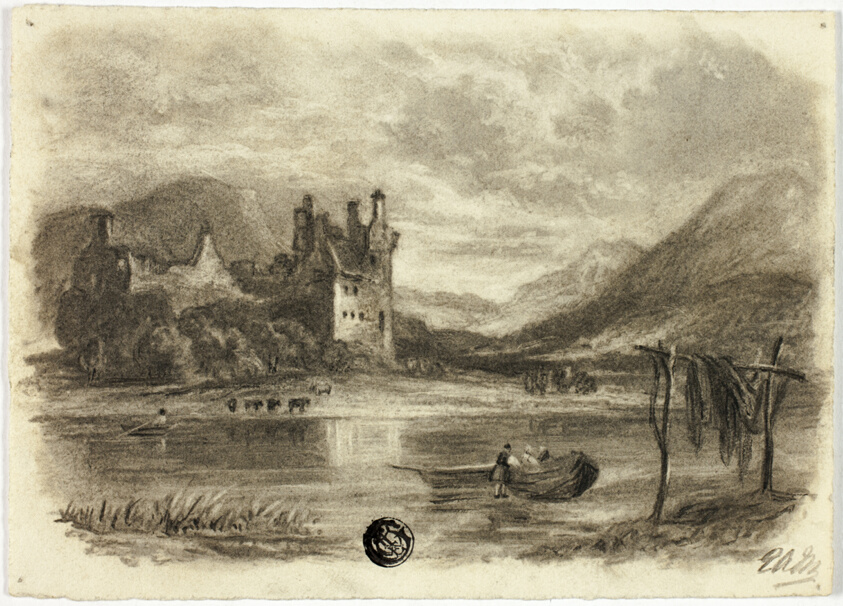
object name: Drawing and Watercolor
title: Fishermen Drying Nets before Castle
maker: Elizabeth Murray (English, c. 1815-1882)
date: c. 1855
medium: Charcoal and stumping with brush and black ink on ivory wove paper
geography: England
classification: charcoal; drawings (visual works); prints and drawing